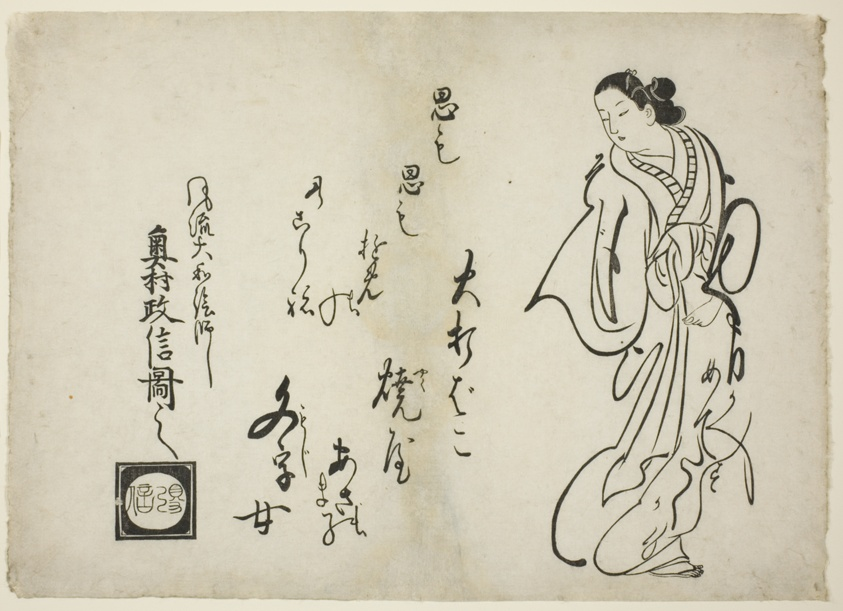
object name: Print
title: Happy Ending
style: Japanese (culture or style)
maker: Okumura Masanobu (Japanese, 1686-1764)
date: c. 1715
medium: Woodblock print; oban yoko-e, sumizuri-e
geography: Japan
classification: woodblock print; print; asian art; woodblock